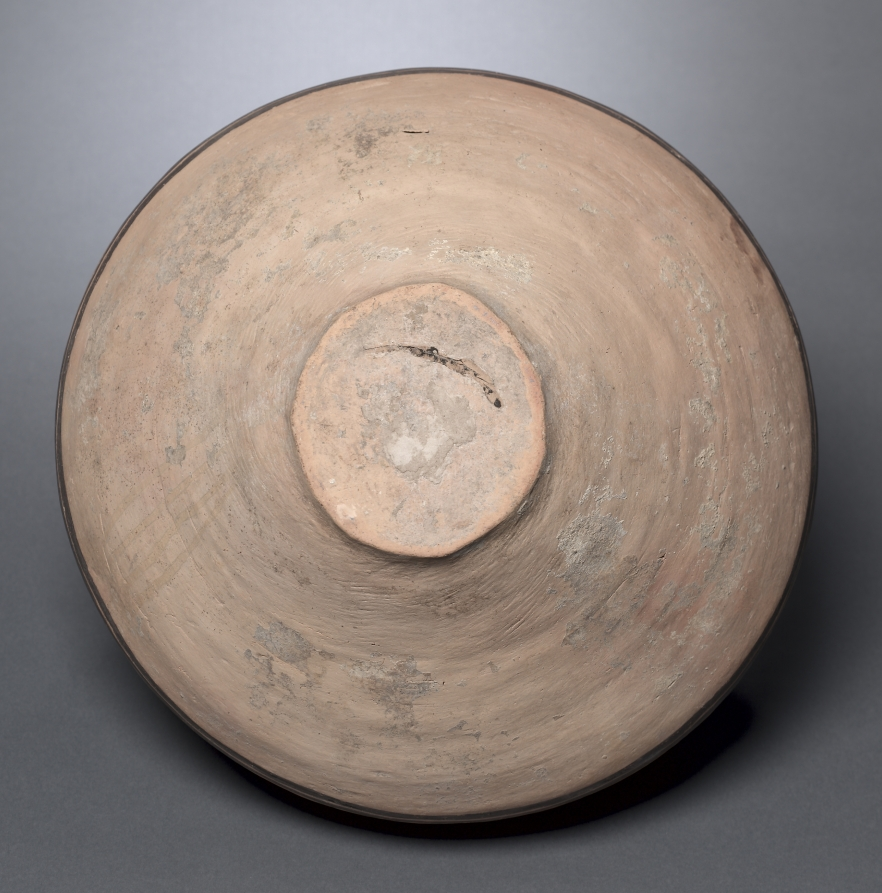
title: Jar with Spiral Designs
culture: Northwest China, Neolithic period, Majiayao culture, Majiayao phase (3300–2650 BCE)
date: 3300–2650 BCE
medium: earthenware with slip-painted decoration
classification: Ceramic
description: This jar is a spectacular example of painted pottery from the Majiayao culture, one of the regional cultures of prehistoric China. Its geometric patterns are probably abstract symbols transformed from a bird image, which may suggest a clan totem or nature spirits. Archaeological work confirms the coexistence of different regional cultures in ancient China, contesting the old belief that the Chinese civilization originated solely along the Yellow River. The artifacts of these cultures manifest distinctive characteristics; each one played a role in the formation of the greater Chinese civilization.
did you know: The spiral designs on this jar were made using an ancient Chinese pottery technique called slip painting.